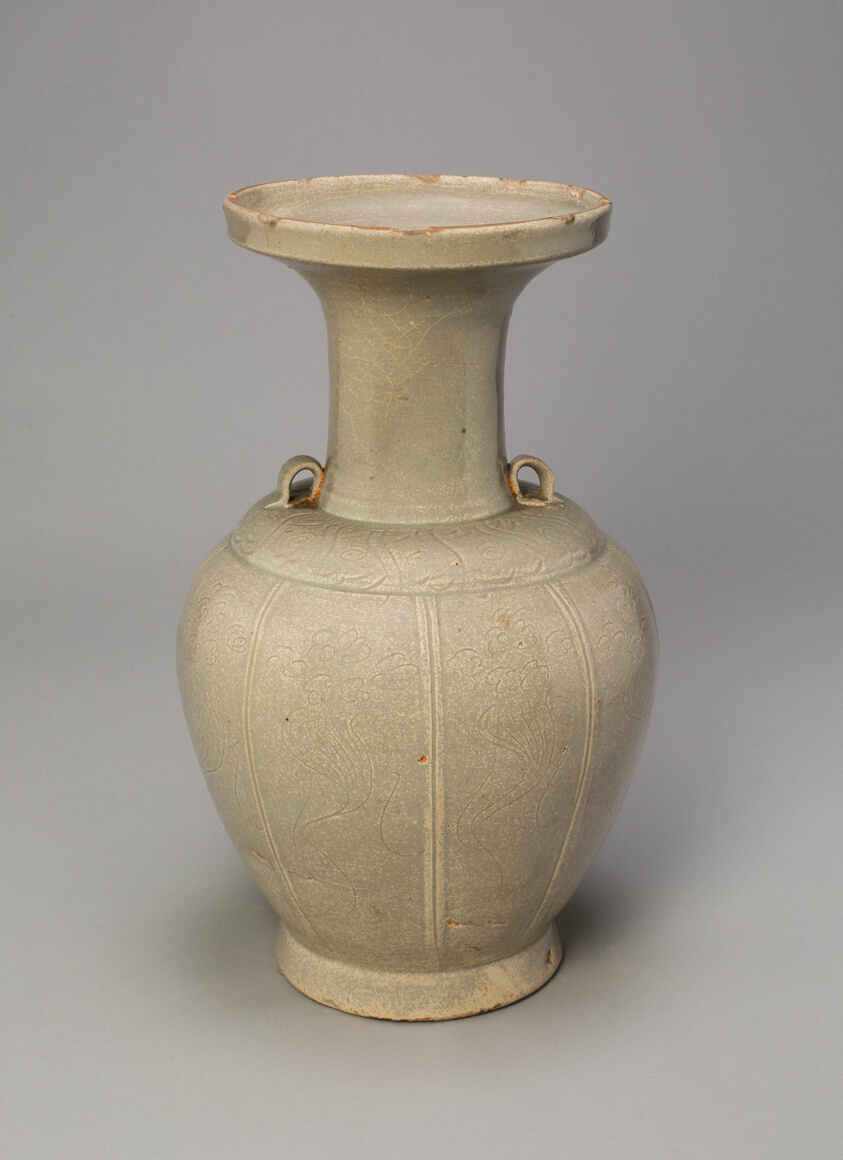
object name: Vessel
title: Trumpet-Mouthed Bottle with Abstract Floral Designs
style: Chinese (culture or style)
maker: China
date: Five Dynasties period (907–960)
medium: Yue ware; stoneware with underglaze incised decoration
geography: China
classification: vase; vessel; stoneware; asian art; ceramics